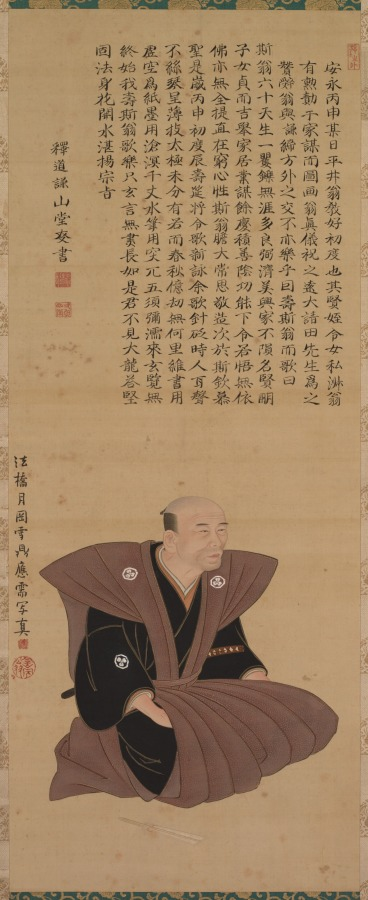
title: Portrait of Samurai-Official: Hirai KyoseiHirai Kyosei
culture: Japan, Edo period (1615–1868)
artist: Tsukioka Settei (Japanese, 1710–1786)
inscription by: Sando Hyosho (Japanese)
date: 1776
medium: hanging scroll; ink and color on silk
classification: Painting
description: In this pair of figure paintings, the artist provided generational portraits of two clan leaders from the Hirai family, accompanied by lengthy inscriptions in a distinctive calligraphic style from separate scholar-officials.